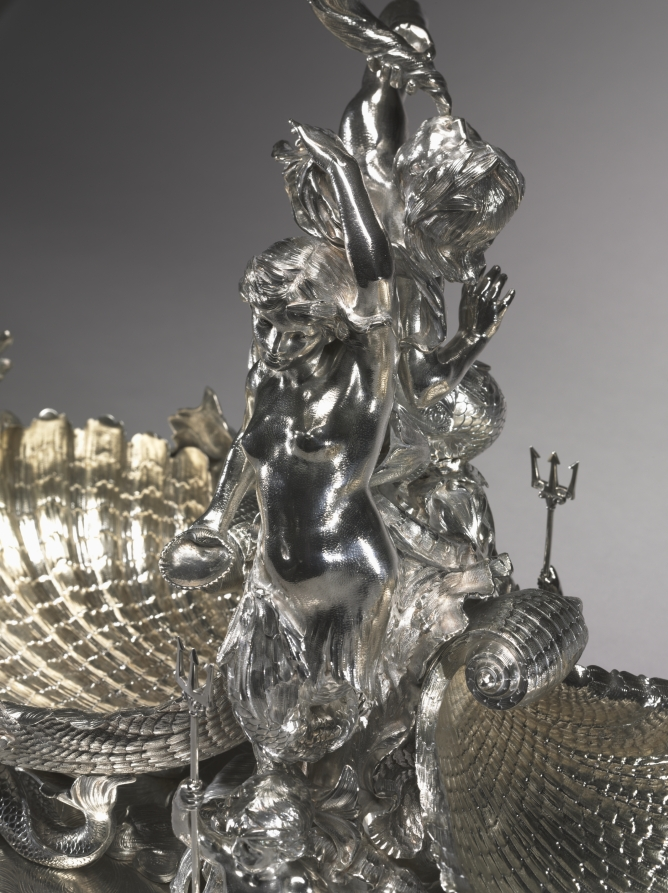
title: Centerpiece from the Nereid Service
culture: England, late 19th-early 20th century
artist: Goldsmith's & Silversmith's Company (British)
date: c. 1900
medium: silver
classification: Silver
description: Originally thought to have been made by the early 19th-century London silversmith Paul Storr because it had been marked with spurious Storr hallmarks, more recent scholarship has revealed that this service, representing the triumph of Great Britain on the high seas through the allegorical images of Grecian nymphs (nereids), was actually made to display at the 1900 world's fair in Paris. Such nationalistic fervor permeated design at the turn of the 20th century, especially in the years leading up to the First World War, when national pride was brought to its heels in Europe through a devastating conflict.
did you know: This centerpiece is actually the product of many hands since the Goldsmiths' and Silversmiths' Company operated as a cooperative of silversmiths who sold their work through the company.